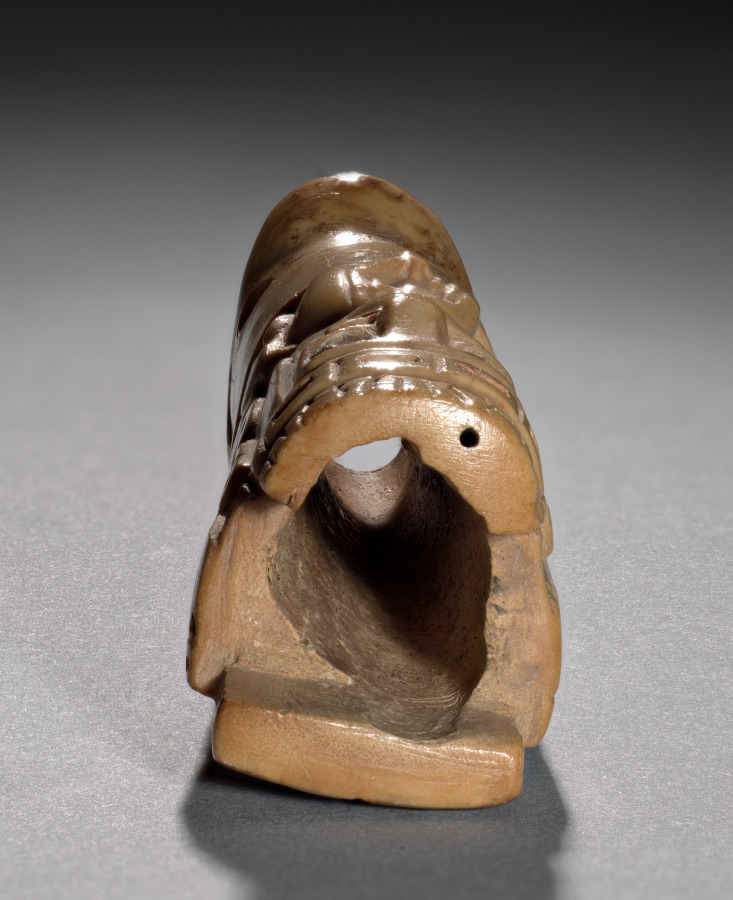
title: Thumb Rest of a Spear Thrower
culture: Andes, Wari people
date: 600–1000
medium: Bone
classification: Implements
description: This object was lashed to a spear thrower, where it served as a thumb rest or grip. The imagery is suited to the use: a supernatural being throttles a human, turning its head to expose its throat to a knife the being holds in one hand. Thus, the scene captures the crucial moment of an offering likely intended to assure the benevolence of divine forces.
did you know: Spear throwers, also called atlatls, use leverage to propel a spear faster and farther.